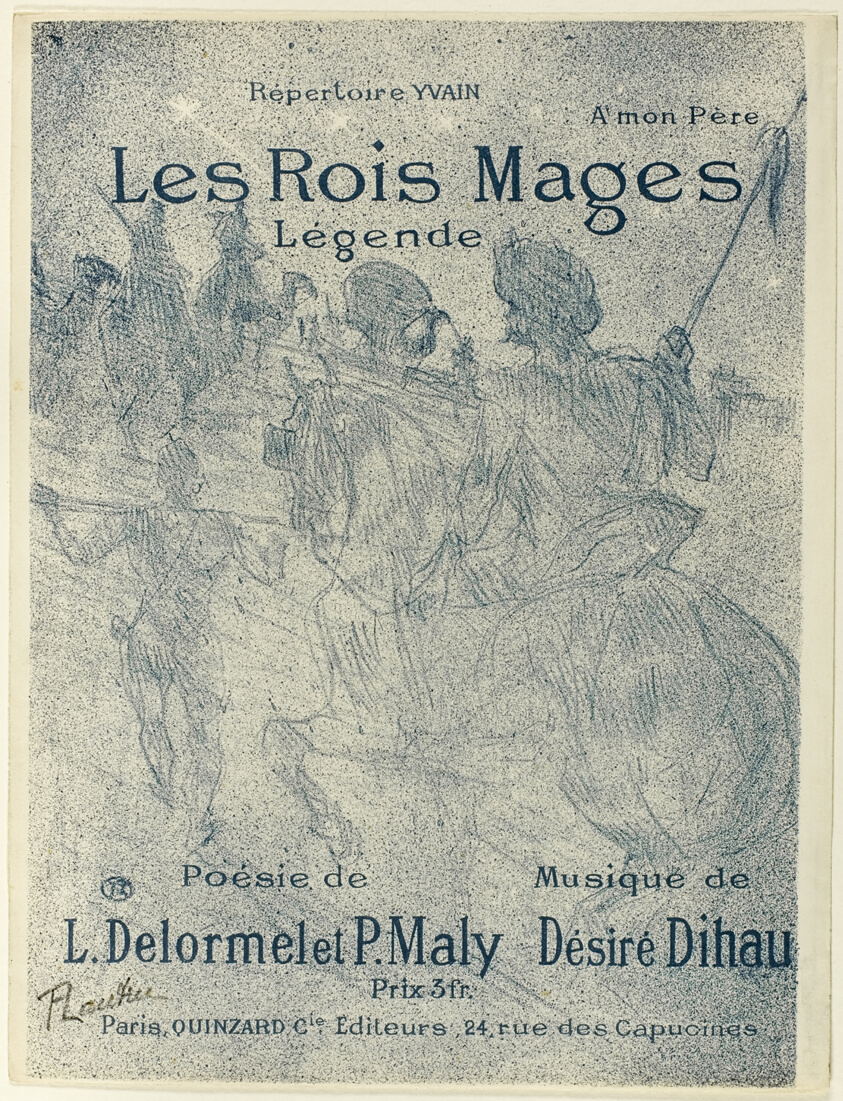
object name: Print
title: The Three Wise Men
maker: Henri de Toulouse-Lautrec (French, 1864-1901)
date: 1895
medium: Color lithograph on cream wove paper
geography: France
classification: lithograph; print; prints and drawing